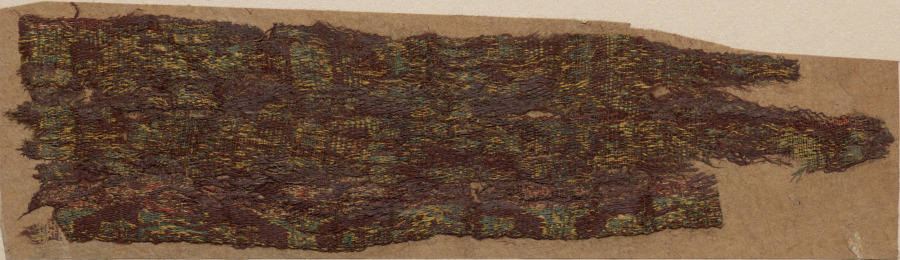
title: Fragment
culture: China or Japan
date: 700s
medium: compound twill, silk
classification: Textile